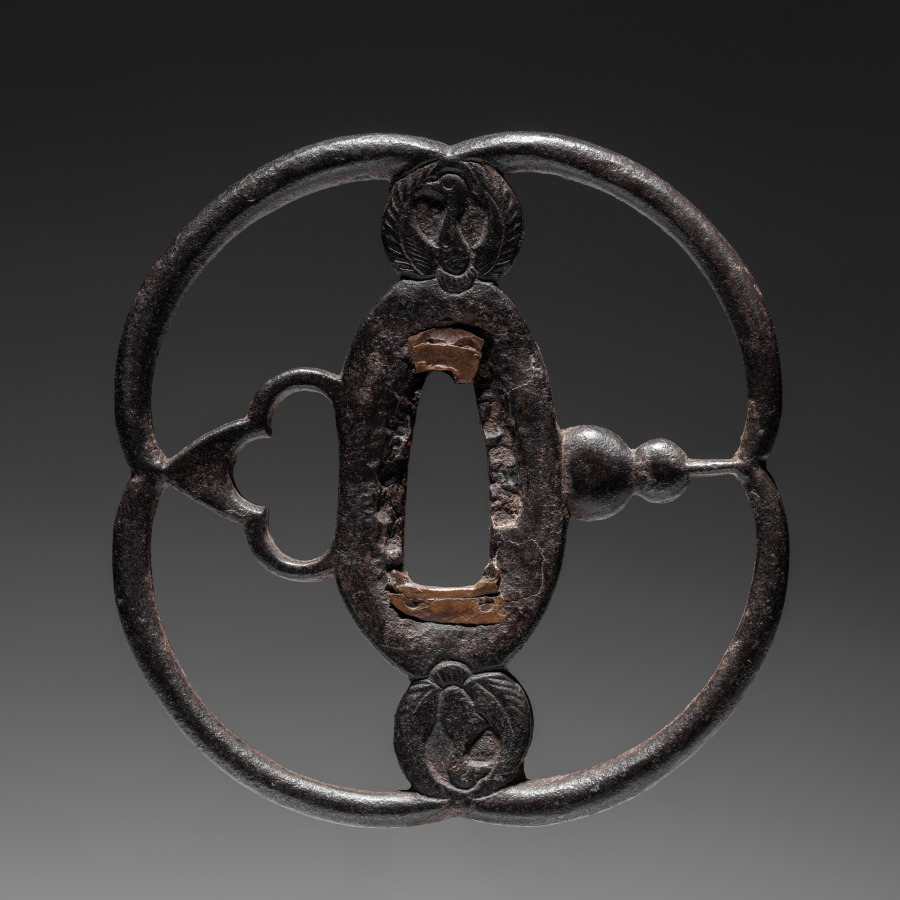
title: Sword Guard (Tsuba) with Cranes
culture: Japan, possibly Edo period (1615-1868)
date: c. 1615–1868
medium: iron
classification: Arms and Armor